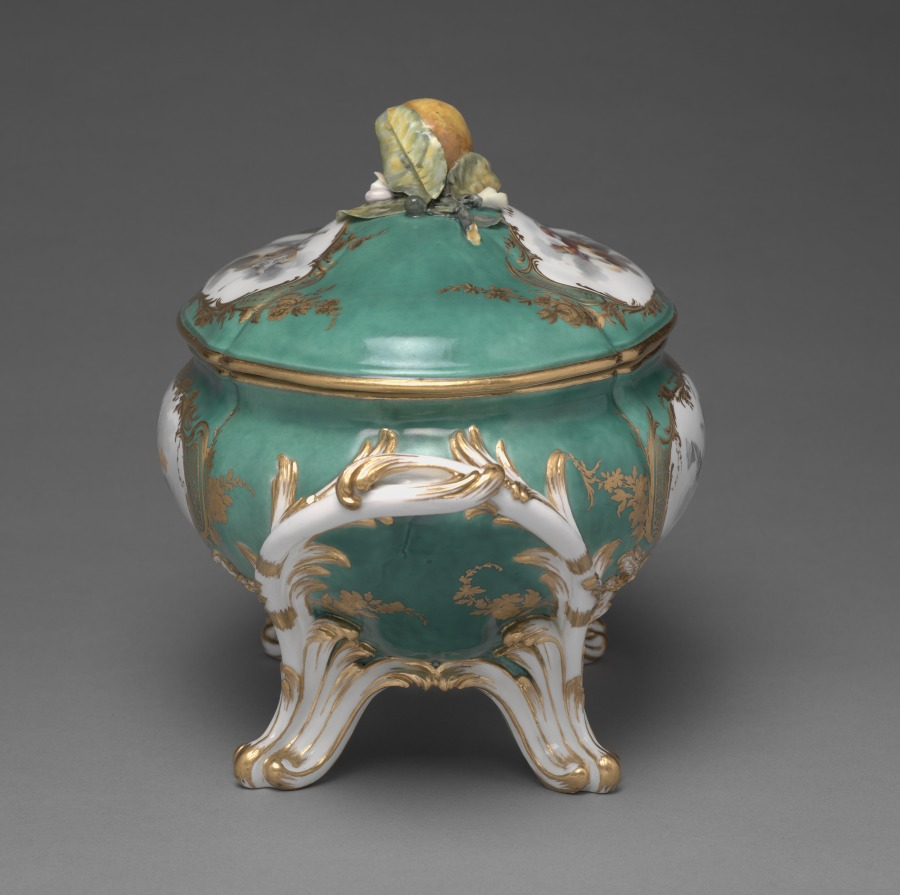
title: Covered Tureen (Terrine du roi)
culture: France, Sèvres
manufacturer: Sèvres Porcelain Factory (French, est. 1756)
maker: attributed to Charles Nicolas Dodin (French, 1734–1803)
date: 1756–57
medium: soft-paste porcelain with enamel and gilt decoration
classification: Ceramic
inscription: [Interlaced L's]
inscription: [Date letter 'D' (in cursive with a dot on either side)]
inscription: [Incised 'b']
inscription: [Incised '6']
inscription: [Inventory numbers in red enamel]: "r.u./710" [base of tureen]; "r.u./710a" [on lid]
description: This tureen’s striking green background, or fond vert, was a major advancement for the Sèvres Porcelain Factory, known for their innovation in and mastery of color. Traditionally the largest, most expensive item in an 18th-century French dinner service, this tureen was part of a porcelain dining set presented to King Frederick V of Denmark by French King Louis XV in 1758.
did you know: French King Louis XV was a great patron of the decorative arts; he acquired the Sèvres Porcelain Factory in 1759.